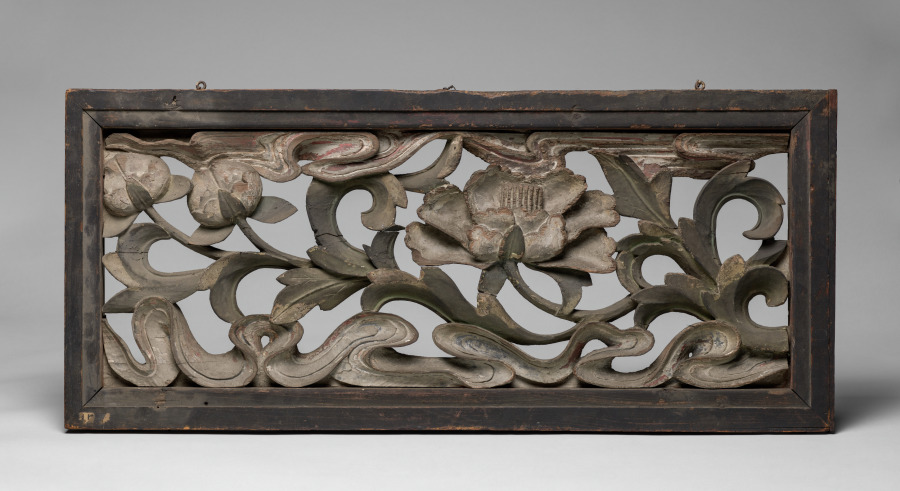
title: Lotus and Waves (Rama)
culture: Japan, Edo period (1615–1868)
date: c. 1800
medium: wood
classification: Wood